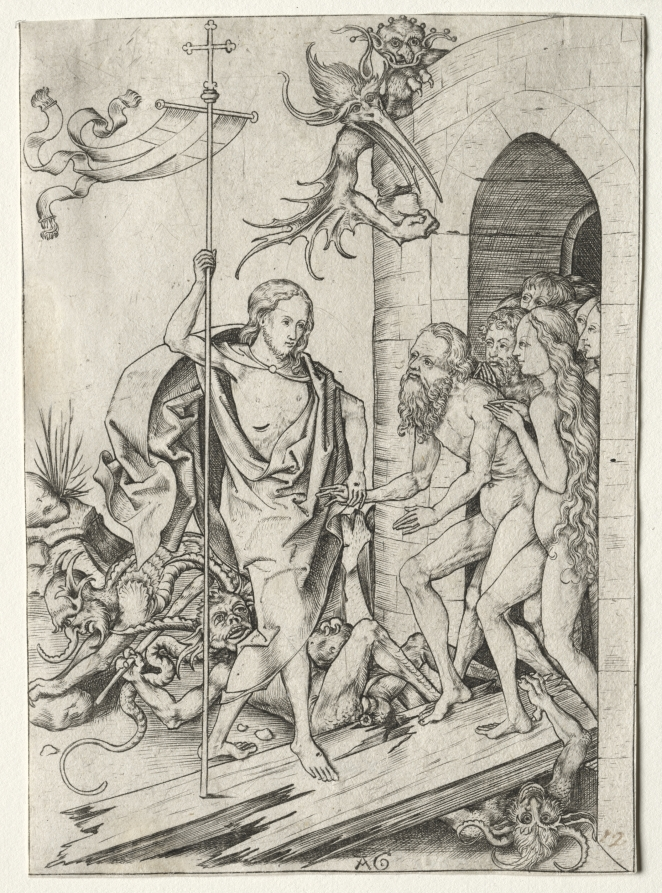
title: Passion of Jesus Christ: The Descent into Limbo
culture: Germany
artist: Master AG (German)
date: 1400s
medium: engraving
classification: Print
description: Christ is shown preparing to enter the doorway leading to limbo, the first circle of hell, in order to redeem the Old Testament saints. The door has symbolically broken from its hinges, crushing Satan beneath. Christ grasps Adam, now old and gray, by the wrist, accompanied by Eve and other Old Testament righteous ones. The artist has creatively depicted a variety of demons who glare helplessly at Christ.